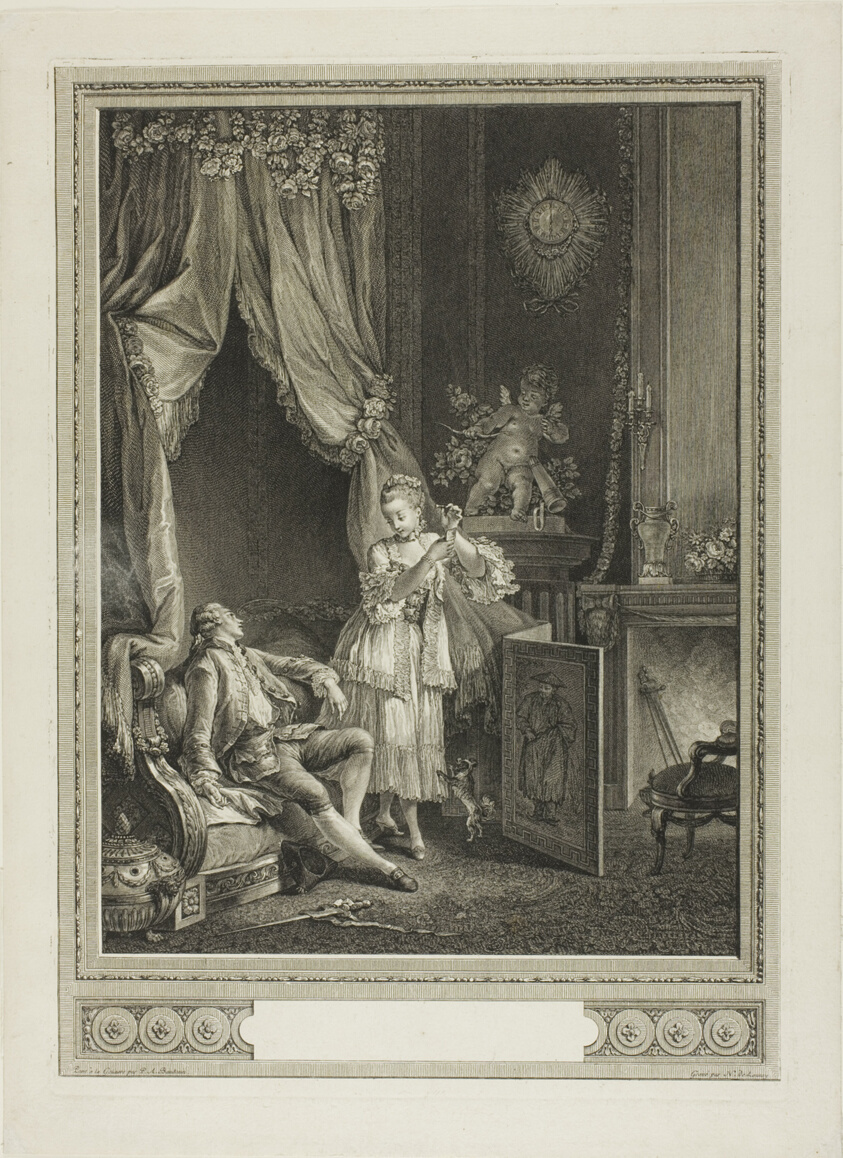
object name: Print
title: Le carquois épuisé (The Empty Quiver)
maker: Nicolas Delaunay (French, 1739-1792); after Pierre Antoine Baudouin (French 1723-1769)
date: 1775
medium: Etching and engraving in black ink on white laid paper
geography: France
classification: etching; print; prints and drawing